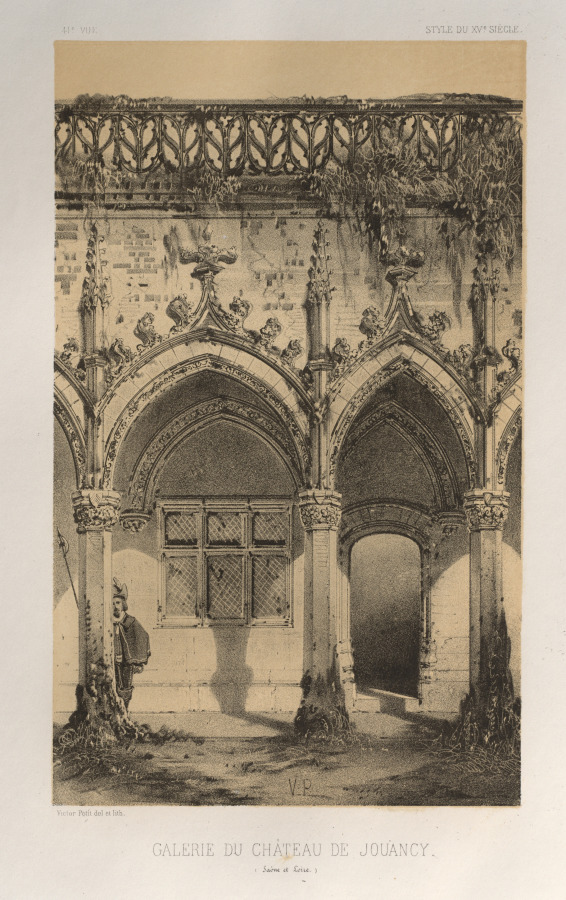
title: Architecture Pittoresque ou Monuments des xveme. Et xvieme. Siecles: Chateaux De France des XV et XVI Siecles: Pl. 41, Galerie Du Château De Jouancy (Saone et Loire)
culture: France, 19th century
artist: Victor Petit (French, 1817–1874)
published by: Charles Boivin (publisher and editor); Lith de Godard a Paris (printer)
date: 1860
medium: lithograph with tint stone, from portfolio of 100 lithographs with tint stone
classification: Print